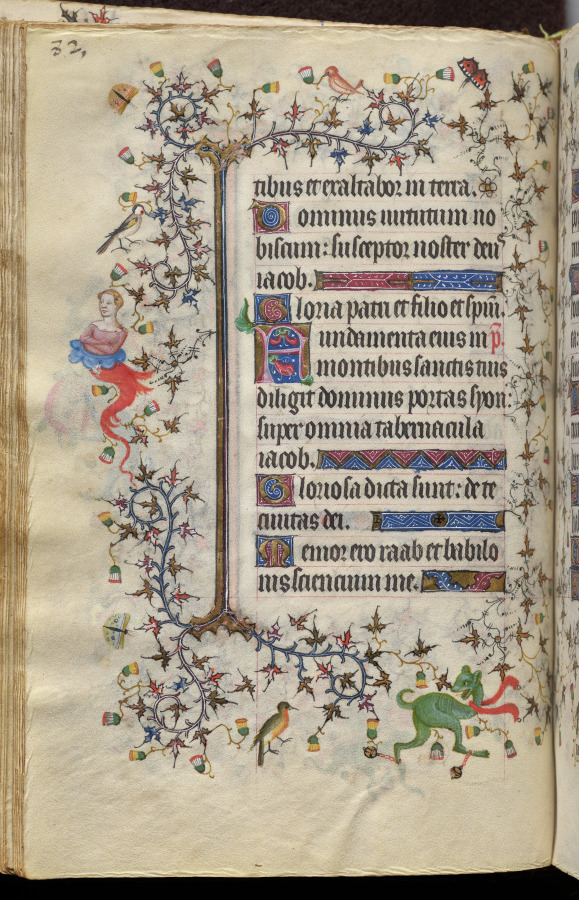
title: Hours of Charles the Noble, King of Navarre (1361-1425): fol. 41v, Text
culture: France, Paris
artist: Master of the Brussels Initials and Associates (French)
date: c. 1405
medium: ink, tempera, and gold on vellum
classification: Bound Volume